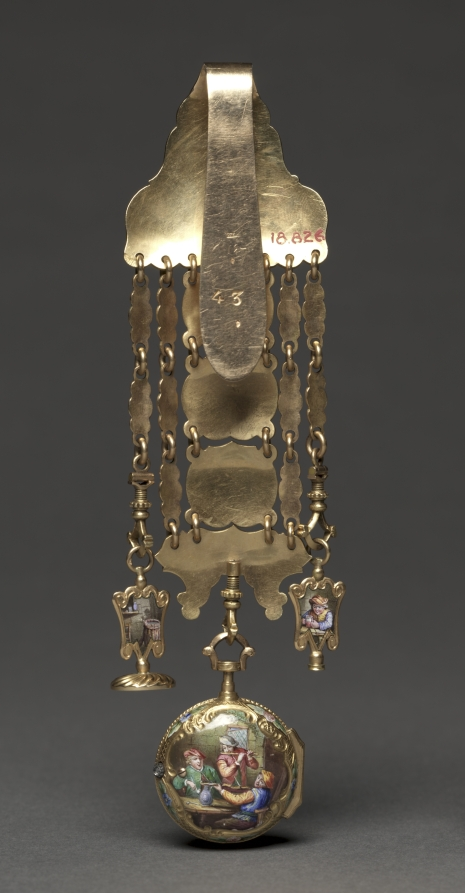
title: Chatelaine Watch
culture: Switzerland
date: mid 1800s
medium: metal and enamel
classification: Jewelry